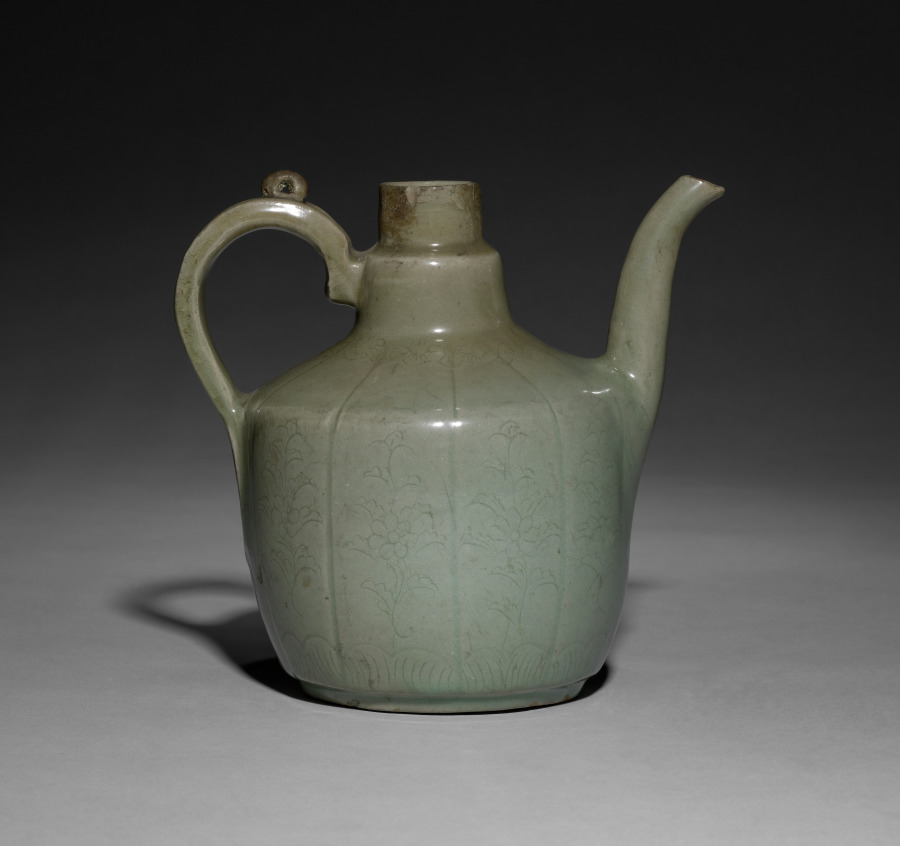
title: Wine Pot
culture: Korea, Goryeo dynasty (918–1392)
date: 918–1392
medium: pottery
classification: Ceramic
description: As early as the seventh century, the practice of drinking tea and wine became an important part of elite culture in Korea. Elites of the Goryeo period commissioned a variety of types of utensils and vessels including this elegant wine pot, not only to make their drinking experience more exciting, but also to show their appreciation of nature.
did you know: A chain or cord once connected a small loop on the handle and the lid to serve beverages without spilling.